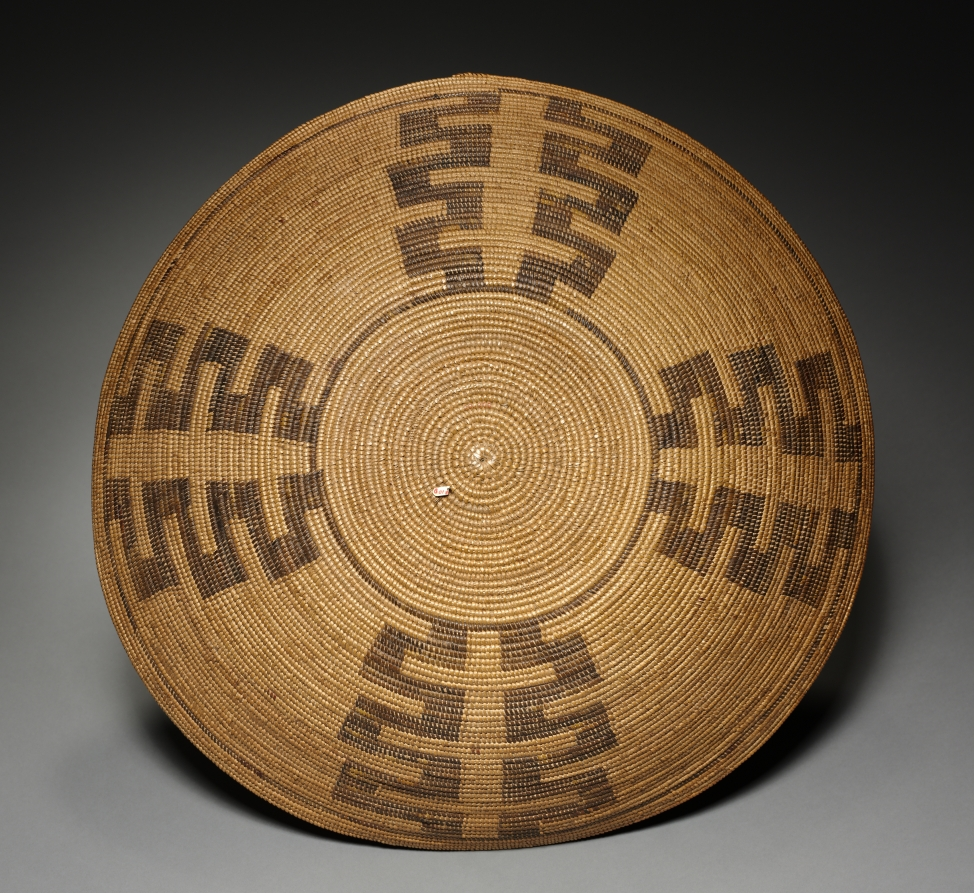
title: Tray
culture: California, Mission, San Diego, Late 19th- Early 20th century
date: c 1875– 1925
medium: Juncus, Sumac; Coiled, Deergrass Foundation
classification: Basketry